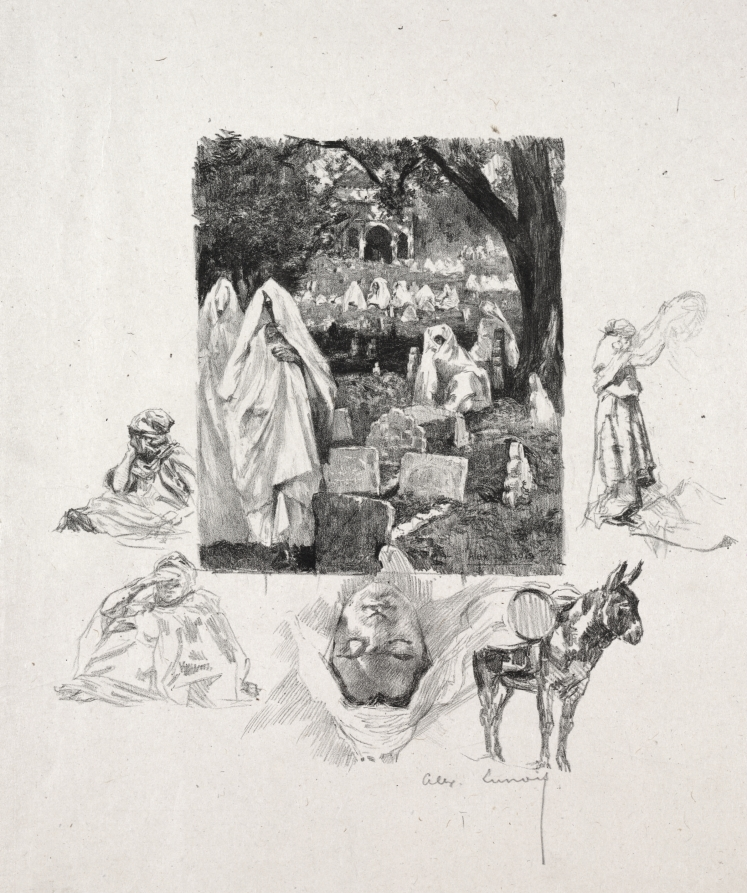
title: Moroccan Sketches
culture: France, 19th century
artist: Alexandre Lunois (French, 1863–1916)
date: c. 1888–1914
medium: lithograph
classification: Print